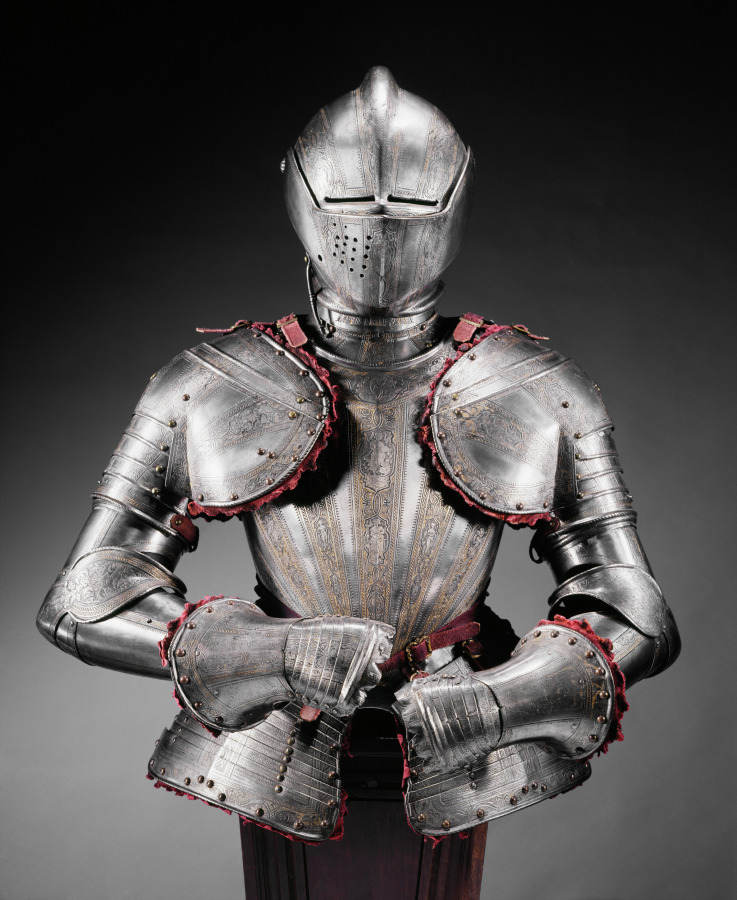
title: Half Armor for the Foot Tournament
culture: Italy, Milan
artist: Pompeo della Cesa (Italian, active 1572–93)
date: c. 1590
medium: etched and gilded steel, brass rivets, leather and velvet fittings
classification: Arms and Armor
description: This armor was designed for the foot tournament, an event that was separate from the equestrian jousts popularized during the Middle Ages and still favored among Renaissance aristocracies throughout Europe. Foot tournaments were commonly fought over a barrier that separated the combatants and gave protection to their legs, so a half-armor such as this one provided sufficient protection. The original owner of this suit would have worn it with colorful puffed and slashed britches and hose. The use of outlandish accessories, such as a large ostrich feather plume (a brass plume holder may be seen on the back of the helmet) and red velvet pickadils between the steel plates, provided additional splendor.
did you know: Pompeo della Cesa was the Armani or Gucci of the 1500s; everyone wanted to wear him.